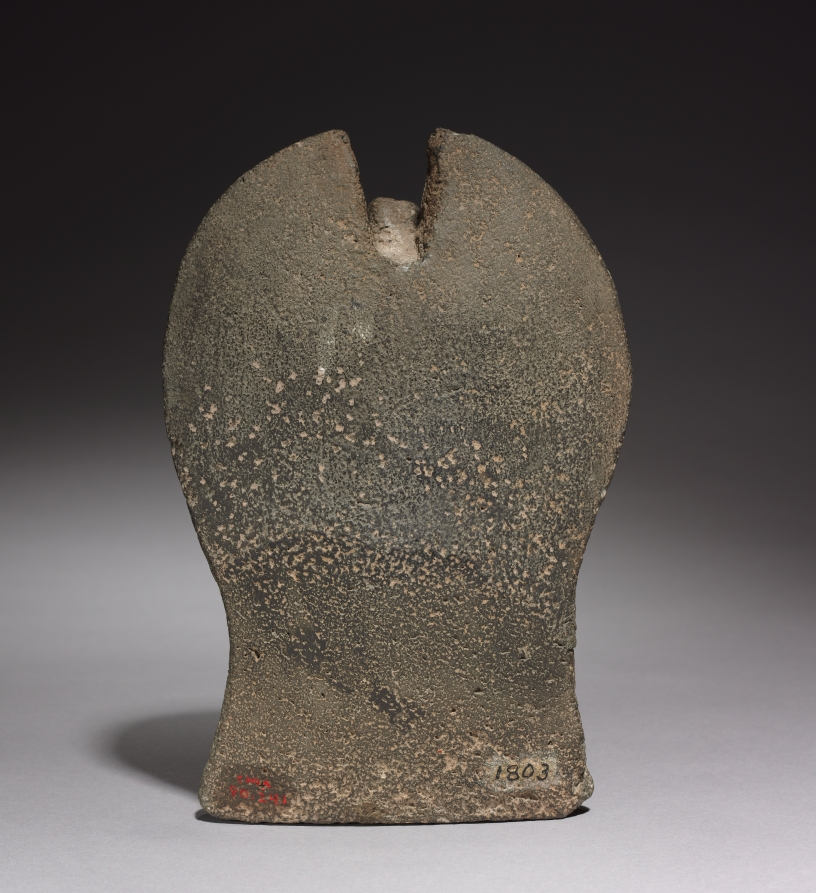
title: Head Palma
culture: Mexico, Veracruz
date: 600–1000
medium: gray volcanic stone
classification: Sculpture